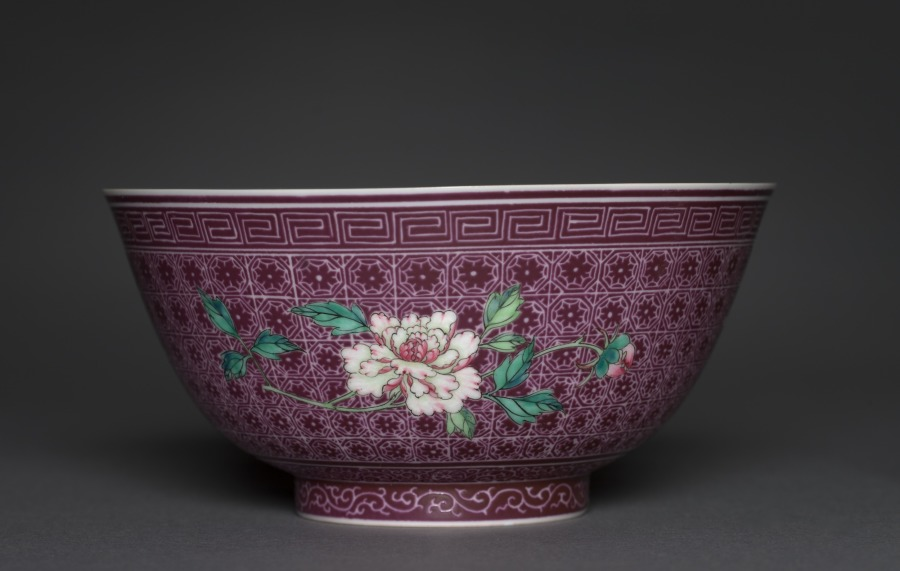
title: Pair of Bowls with Peony Sprays on Diaper Ground (exterior); Chrysanthemum Sprays (interior)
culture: China, Jiangxi Province, Jingdezhen, Qing dynasty (1644–1911), Qianlong mark and reign (1736–95)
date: 1736–95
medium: porcelain with famille rose overglaze enamel decoration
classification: Ceramic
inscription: 乾隆年製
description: The production of extraordinarily refined Qing imperial wares such as these could have involved the transportation of undecorated, plain porcelains from the imperial kilns in Jingdezhen, Jiangxi province, to the palace workshops in Beijing, where court painters applied the polychrome enamel decoration. The Qianlong reign mark on the base of the bowl is written with blue enamel over the transparent glaze.